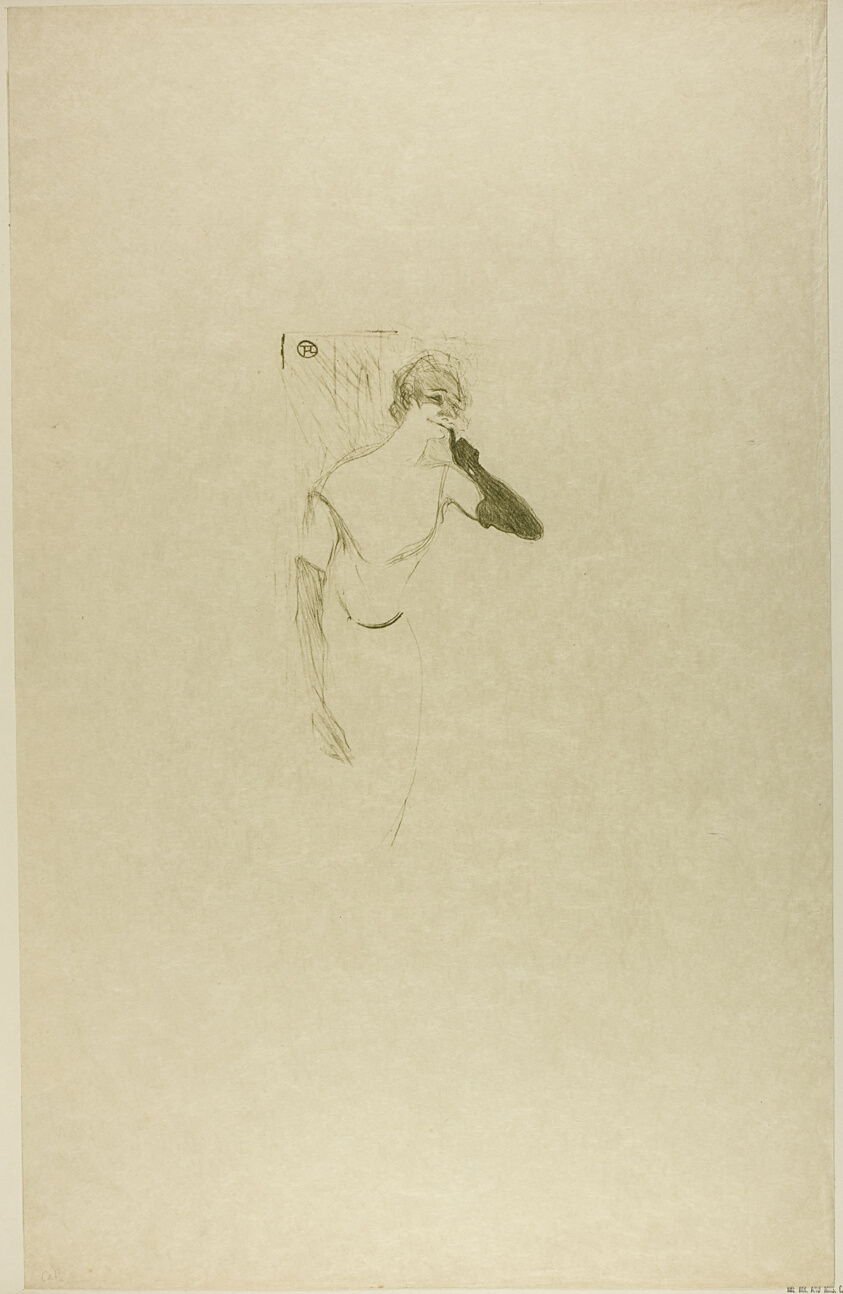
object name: Print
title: Yvette Guilbert, in Colombine à Pierrot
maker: Henri de Toulouse-Lautrec (French, 1864-1901)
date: 1894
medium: Color lithograph on cream wove paper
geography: France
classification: lithograph; print; prints and drawing